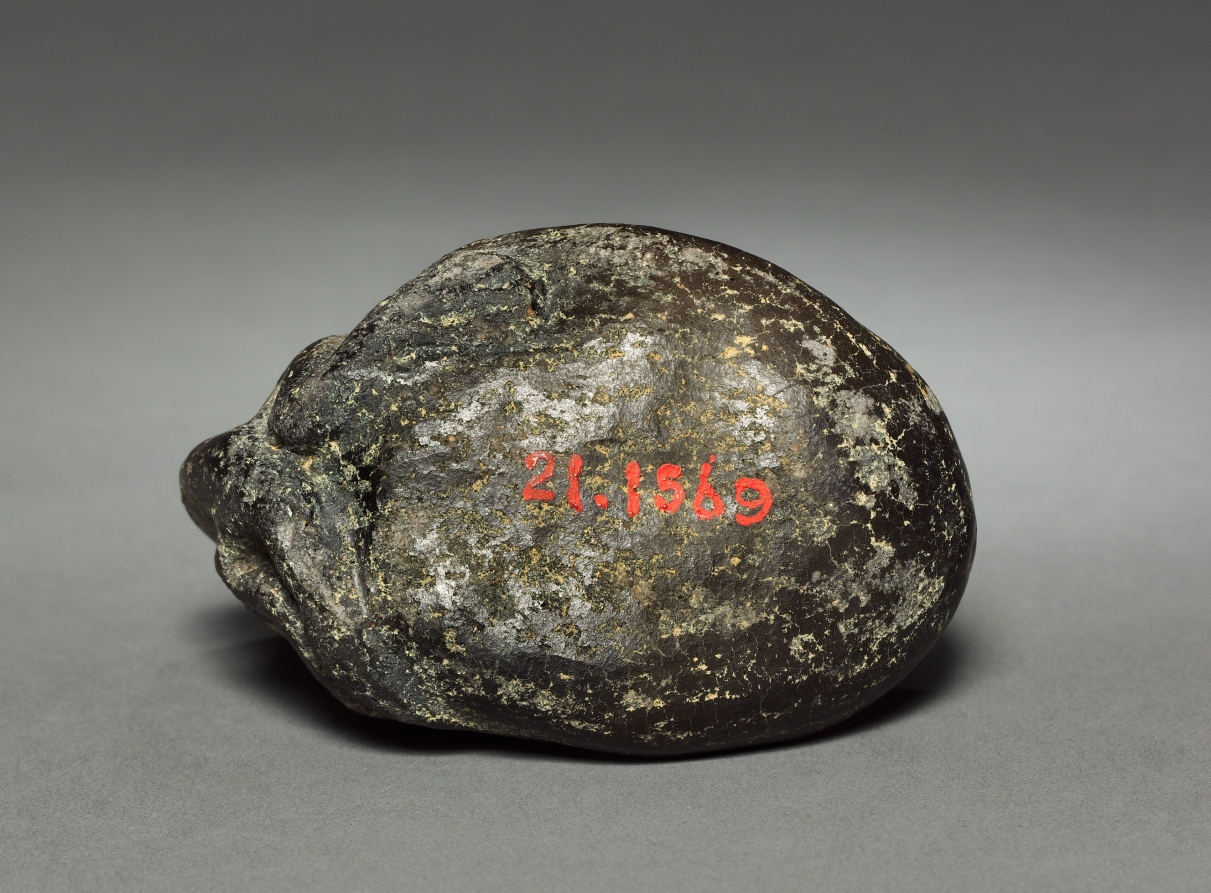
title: Dish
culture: Colombia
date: before 1921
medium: pottery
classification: Ceramic